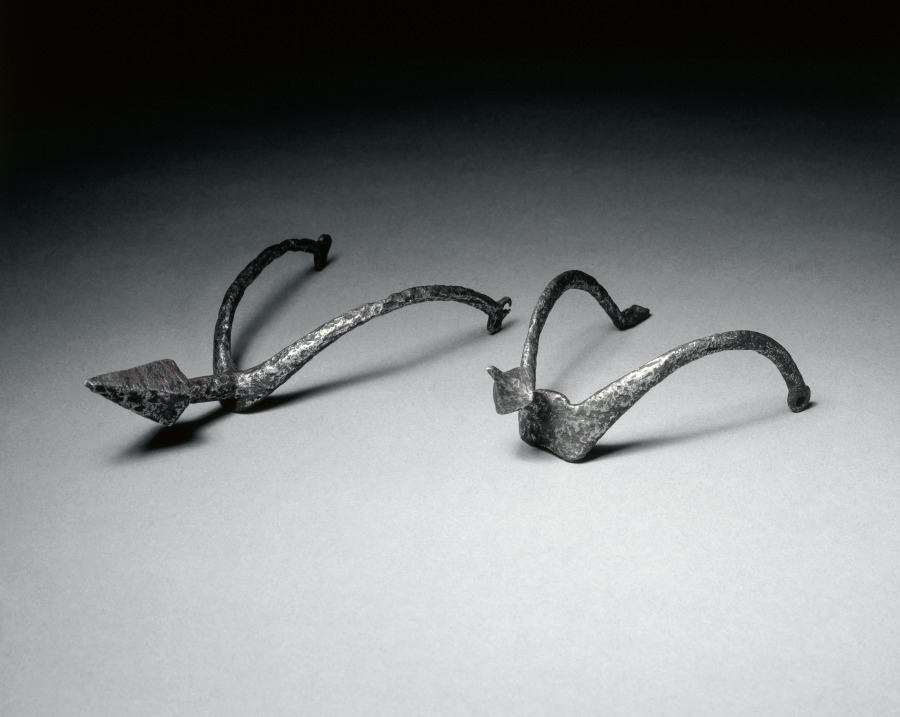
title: Pricked Spur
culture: Spain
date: 1200s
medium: steel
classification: Arms and Armor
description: The spur was an essential part of the knight's equipment. Fastened to his heels by means of straps and buckles, it was used to prod a horse into action. These examples represent the oldest type recorded, the "pricked" spur, so-called because its neck terminated in a spike. The pricked spur was replaced during the Middle Ages by the "rowel" spur, with a rotating spiked wheel.